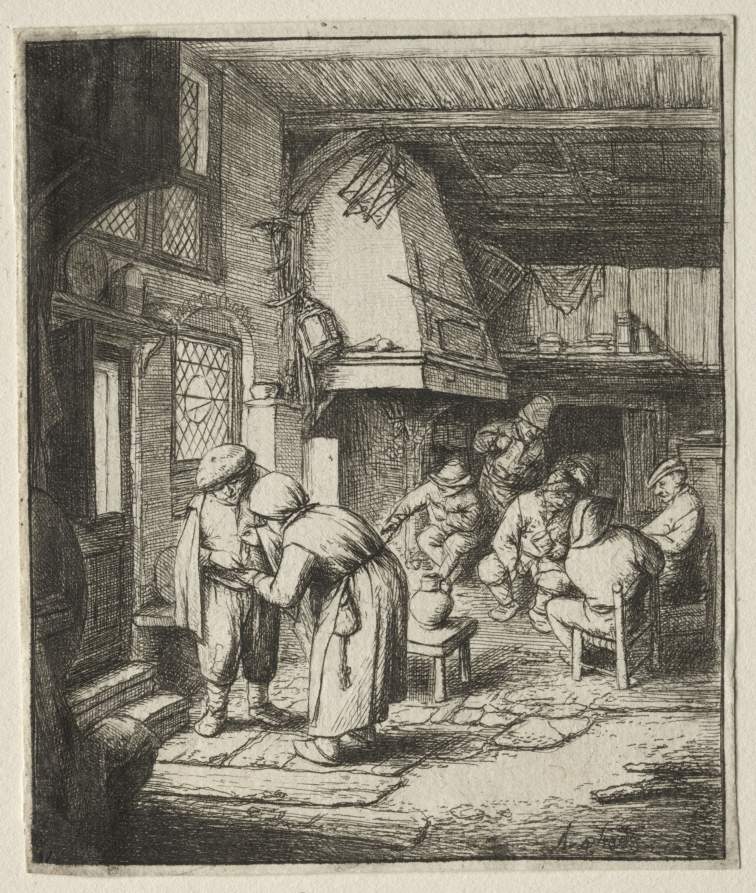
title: Peasant Settling his Debt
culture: Netherlands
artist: Adriaen van Ostade (Dutch, 1610–1684)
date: c. 1647–53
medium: etching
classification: Print